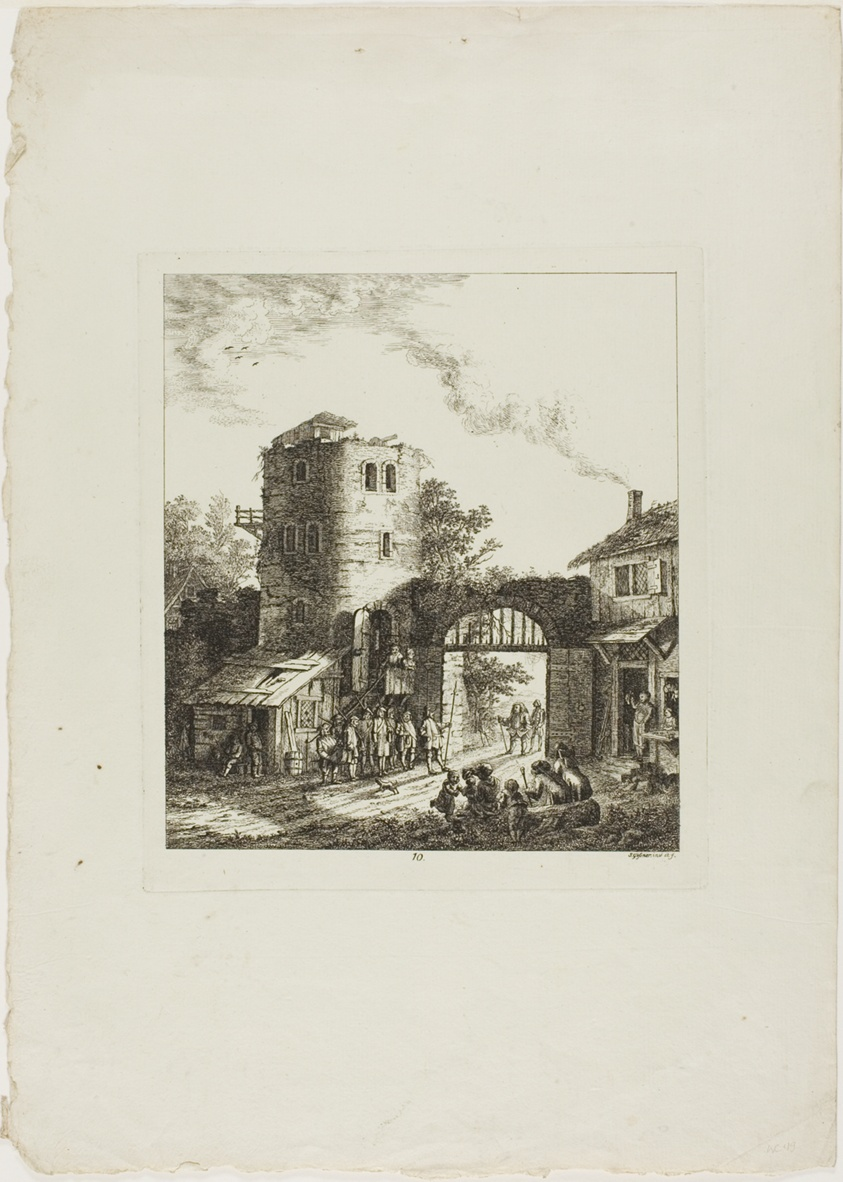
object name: Print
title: Procession through a Rustic Gate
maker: Salomon Gessner (Swiss, 1730-1788)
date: 1764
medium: Etching on cream laid paper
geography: Switzerland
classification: etching; print; prints and drawing